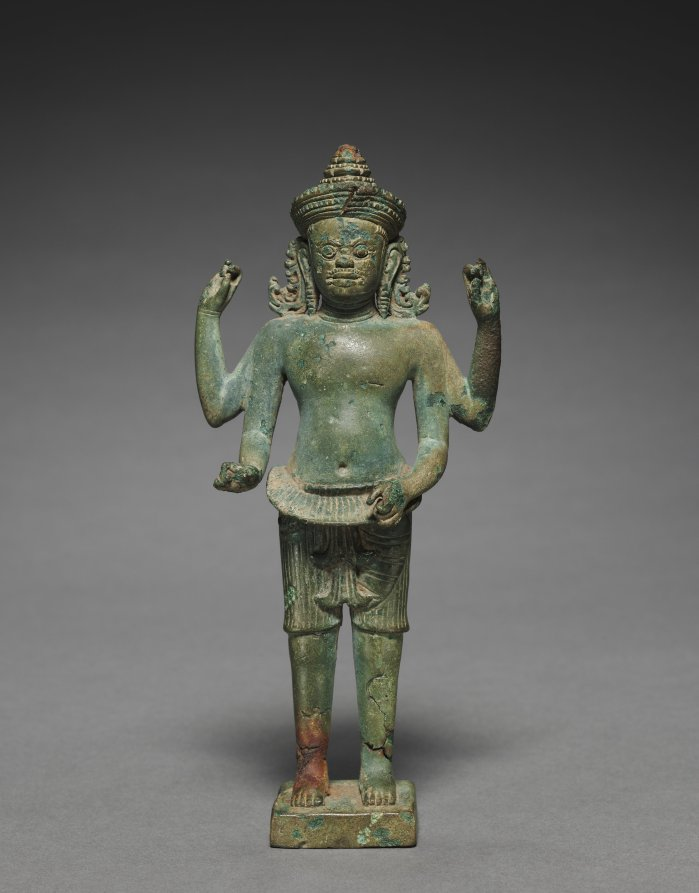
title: Standing Ashura with Four Arms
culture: Cambodia, Koh Ker style, 2nd quarter of 10th Century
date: 925–950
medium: bronze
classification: Sculpture